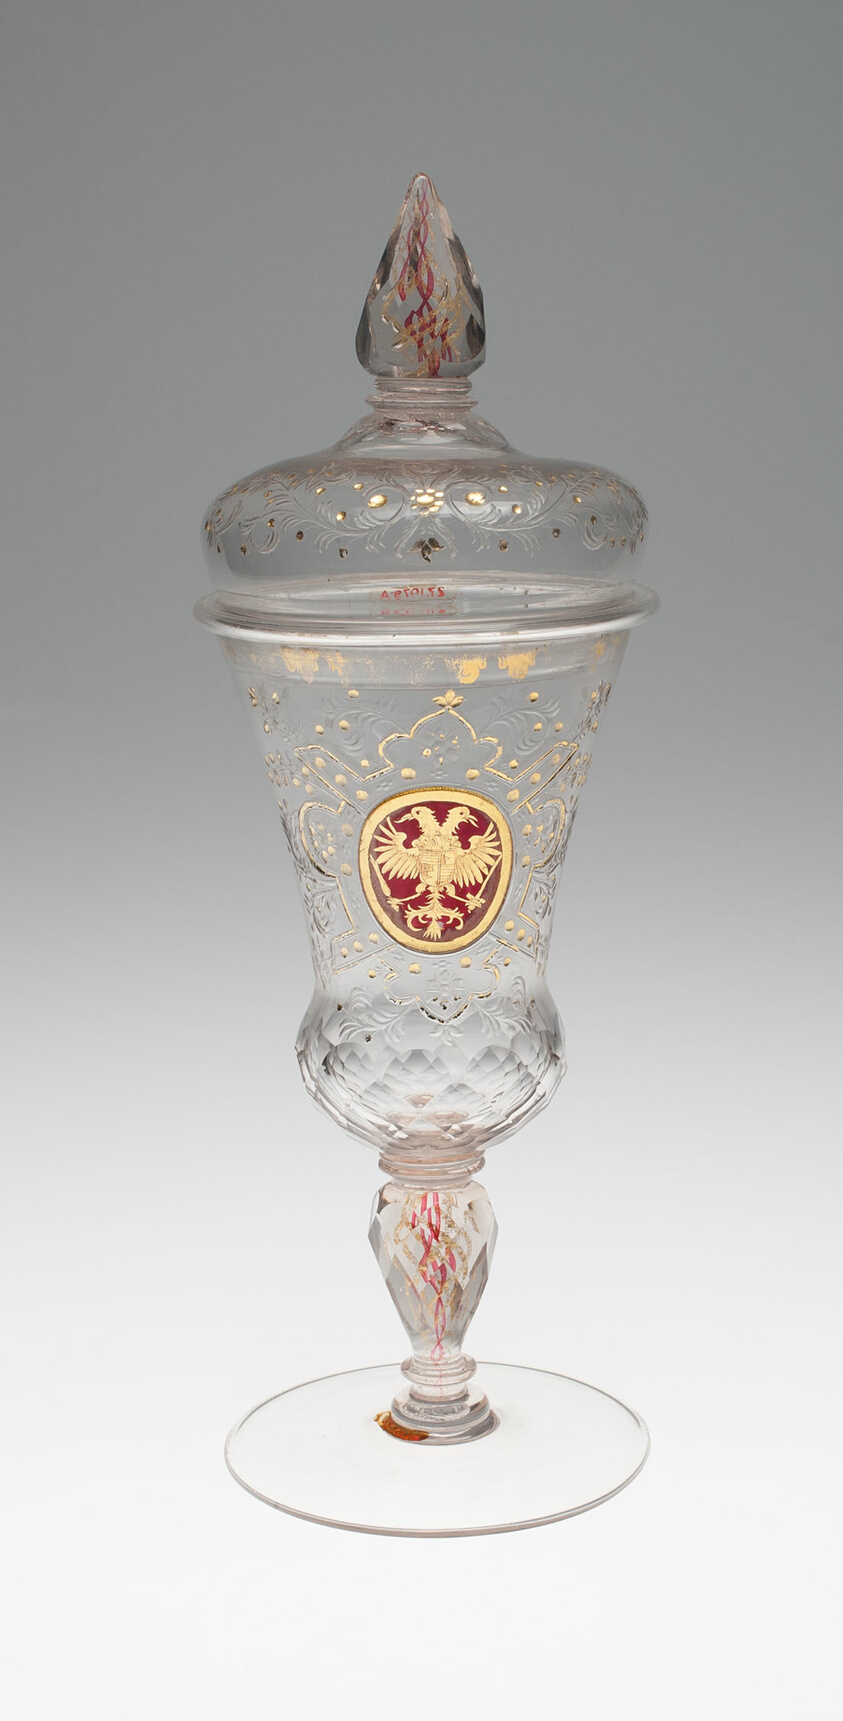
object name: Glass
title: Covered Goblet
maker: Bohemia, Czech Republic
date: c. 1730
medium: Glass; cut with ruby glass and gold decoration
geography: Bohemia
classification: drinking vessel; glass; european decorative arts